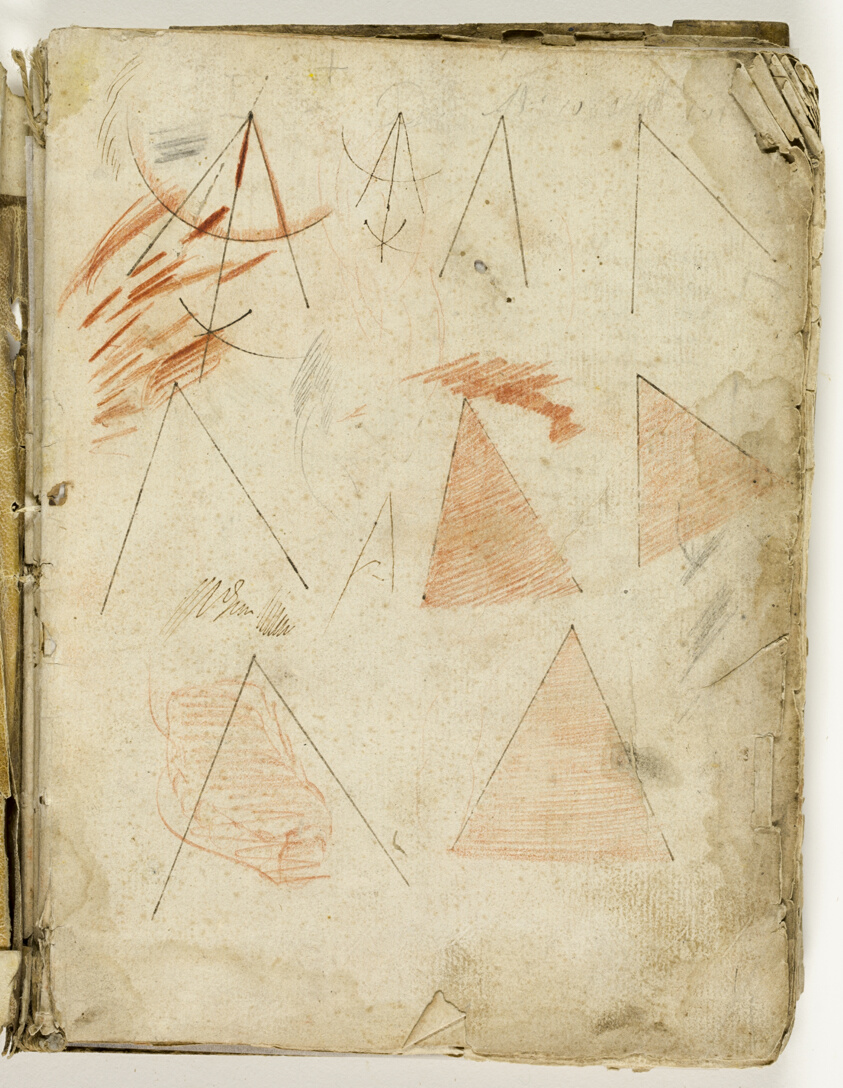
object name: Drawing and Watercolor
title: Sketchbook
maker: Cherubino Alberti (Italian, 1542-1615); or a follower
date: c. 1590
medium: Sketchbook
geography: Italy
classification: sketchbook; drawings (visual works); prints and drawing